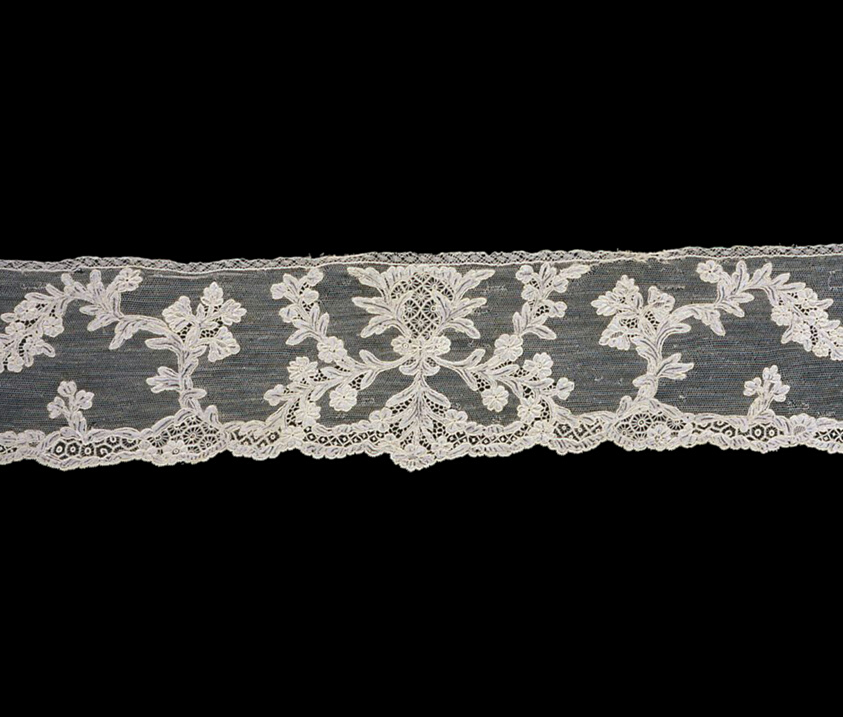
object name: Textile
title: Border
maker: Italy, Burano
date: 1760s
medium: Linen, needle lace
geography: Italy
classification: textile; lace - needle